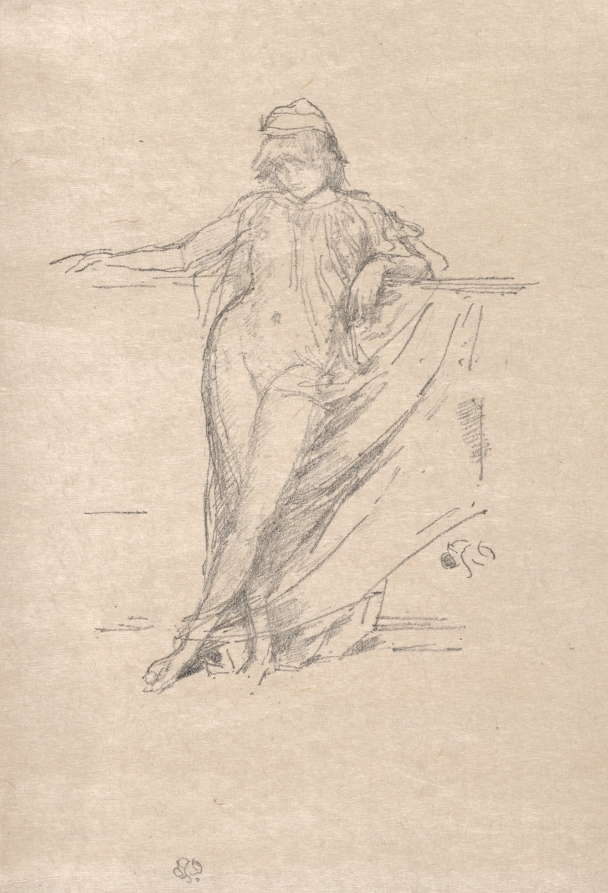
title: Little Draped Figure Leaning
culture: America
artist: James McNeill Whistler (American, 1834–1903)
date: 1894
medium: lithograph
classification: Print